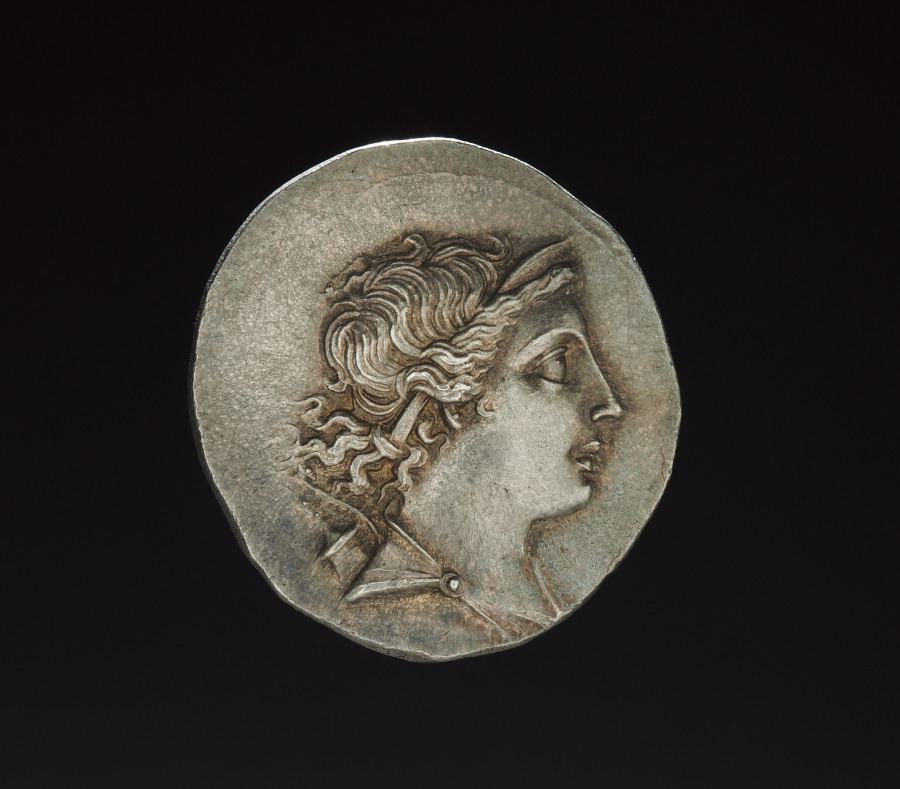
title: Tetradrachm Coin of Herognetos, Magistrate of Magnesia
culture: Turkey, Ionia, Magnesia on the Maeander, Hellenistic Period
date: 155–145 BCE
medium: silver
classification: Silver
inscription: MAGNETON EROGNETOS ZOPURIONOS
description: The front has a bust of Artemis, a diadem circling her head and a quiver over her shoulder. On the reverse is Apollo Delphios holding a laurel branch, standing on a meander pattern, and leaning his left elbow on a tripod, all within a laurel wreath. Magnesia is located southeast of Ephesus on a tributary of the Meander River.